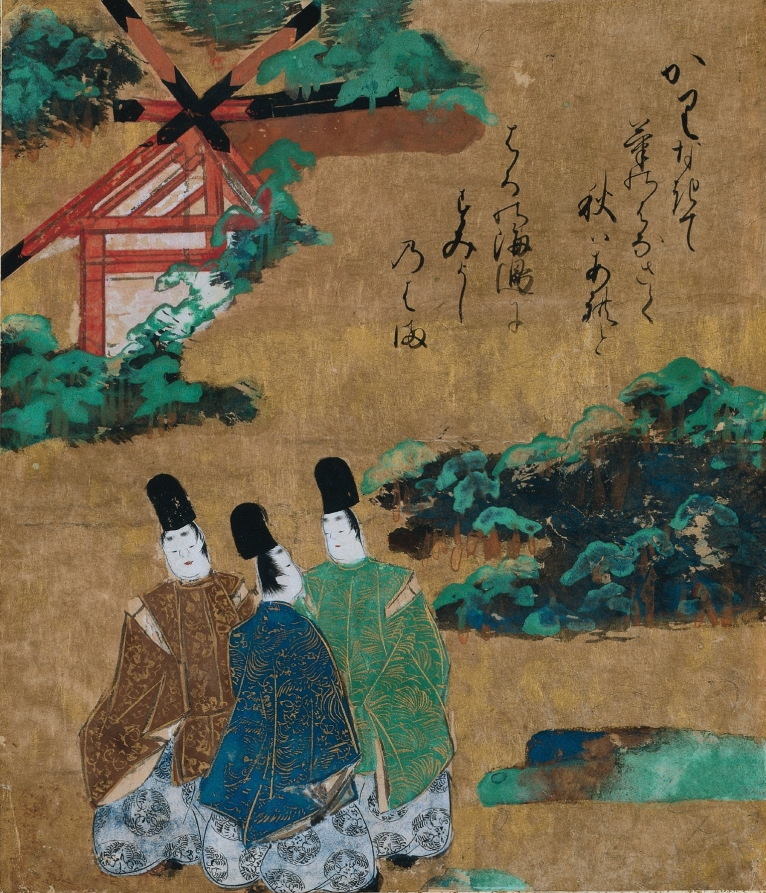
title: The Beach at Sumiyoshi from the Tales of Ise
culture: Japan, Edo period (1615–1868)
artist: Tawaraya Sōtatsu (Japanese, c. 1570–c. 1640)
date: c. 1634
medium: Poetry sheet mounted as an album leaf; ink, color, and gold on paper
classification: Painting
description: The poem written on the painting comes from The Tales of Ise, a 10th-century poetic narrative of love: In autumn the wild geese cry And chrysanthemums are in flower, Yet how pleasant to dwell By the sea in spring On the Beach of Sumiyoshi.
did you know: The red structure at the top of this composition is Sumiyoshi Taisha, the Grand Shrine at Sumiyoshi.